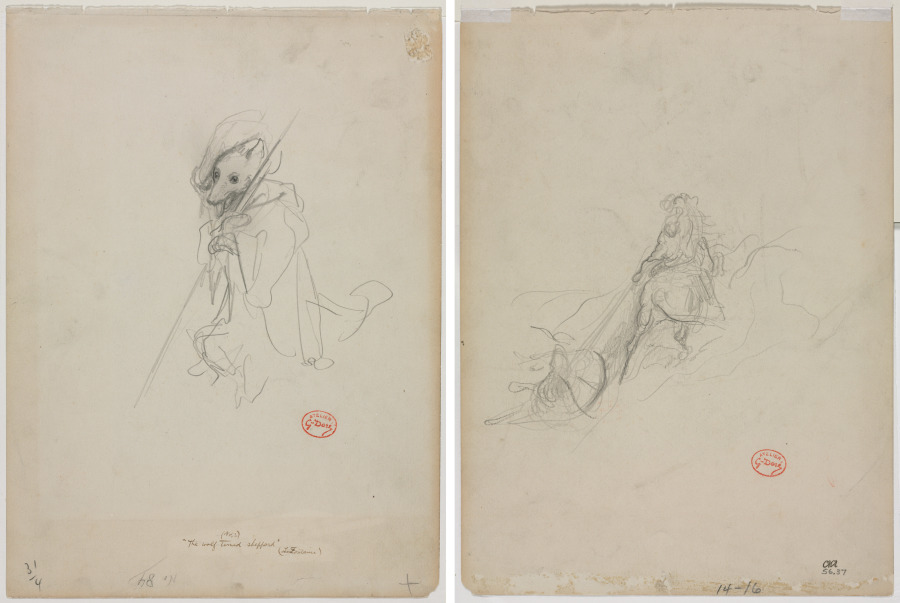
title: Sketch for "The Wolf Turned Shepherd" (recto) Sketch of Hunting Scene (verso)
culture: France, 19th century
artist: Gustave Doré (French, 1832–1883)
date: c. 1868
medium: graphite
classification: Drawing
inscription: lower left, in graphite: 31/4 ; lower center, in brown ink: (No. 2) / "The wolf turned sheppard" / (LaFontaine) ; lower center, in graphite: No 84 [upside down] [84 underlined] ; lower right, in graphite: X